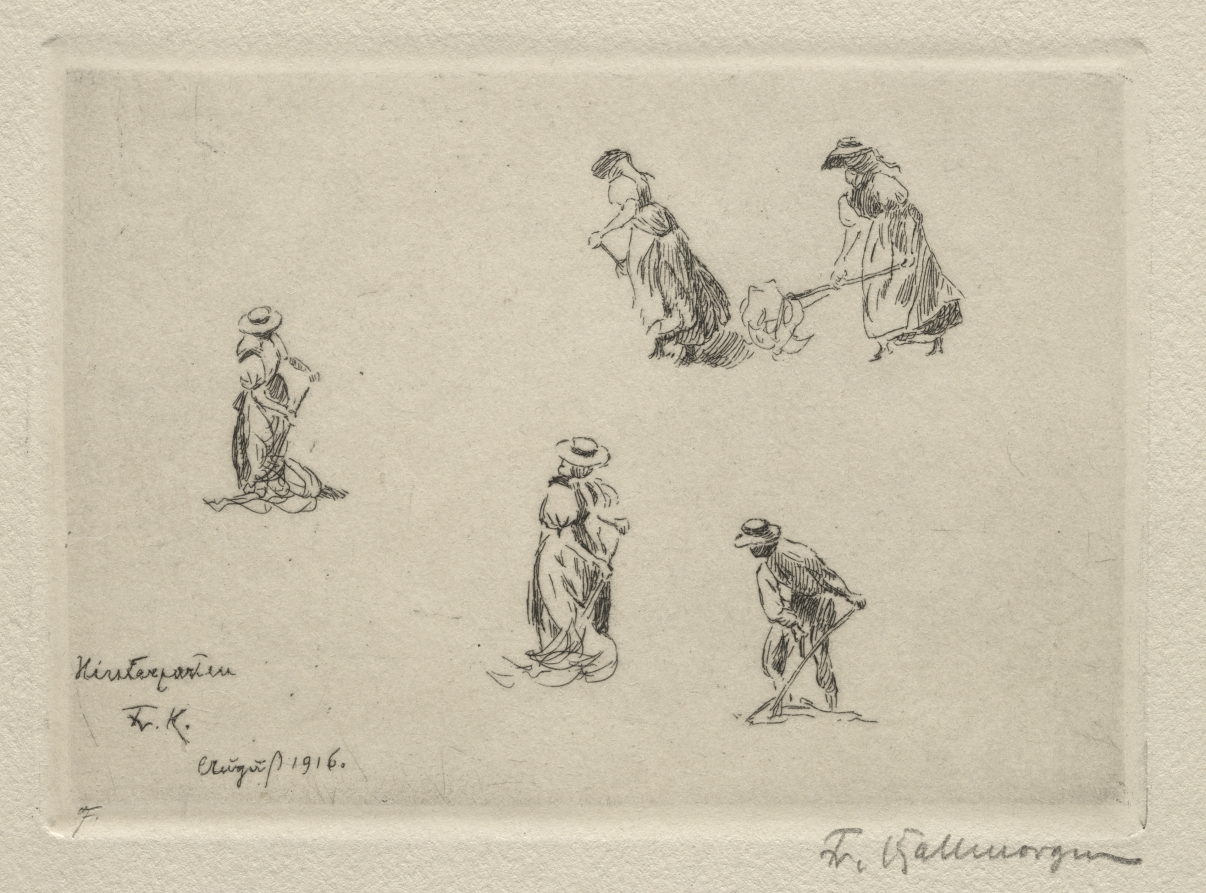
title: Haymakers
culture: Germany, 19th century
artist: Friedrich Kallmorgan (German, 1856–1924)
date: 1916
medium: etching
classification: Print